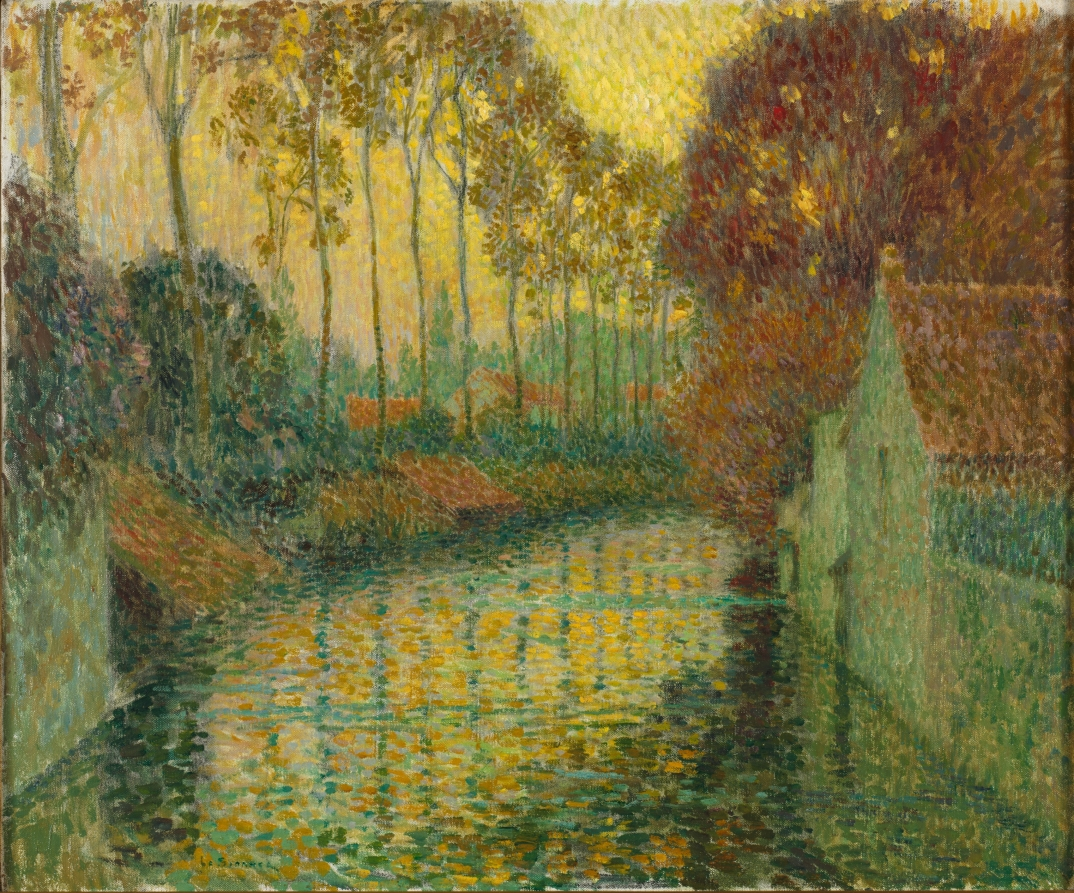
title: Canal in Autumn (Gisors)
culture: France, early 20th century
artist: Henri Le Sidaner (French, 1862–1939)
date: 1913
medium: oil on canvas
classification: Painting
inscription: Distinguishing marks on canvas face: signed with green painting in the lower left: "Le Sidaner"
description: This painting depicts a canal in Gisors, a commune in Normandy, about 40 miles northwest of Paris on the river Epte. Le Sidaner painted this work in a Divisionist technique of applying pure color in large, broken strokes, often separated by areas of white or gray. Unlike the Impressionists, Le Sidaner preferred a restrained palette of delicately nuanced tones that evoke a mood of quiet mystery. His views of old canals, typically portrayed in a crepuscular or nocturnal light, and completely absent of figures, allude to the passage of time and a timeless eternity that exceeds the human life span.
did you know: Le Sidaner often painted from memory rather than directly on site, and his subdued use of color applied in uneven brushstrokes bring a poetic, dreamlike effect to his paintings.